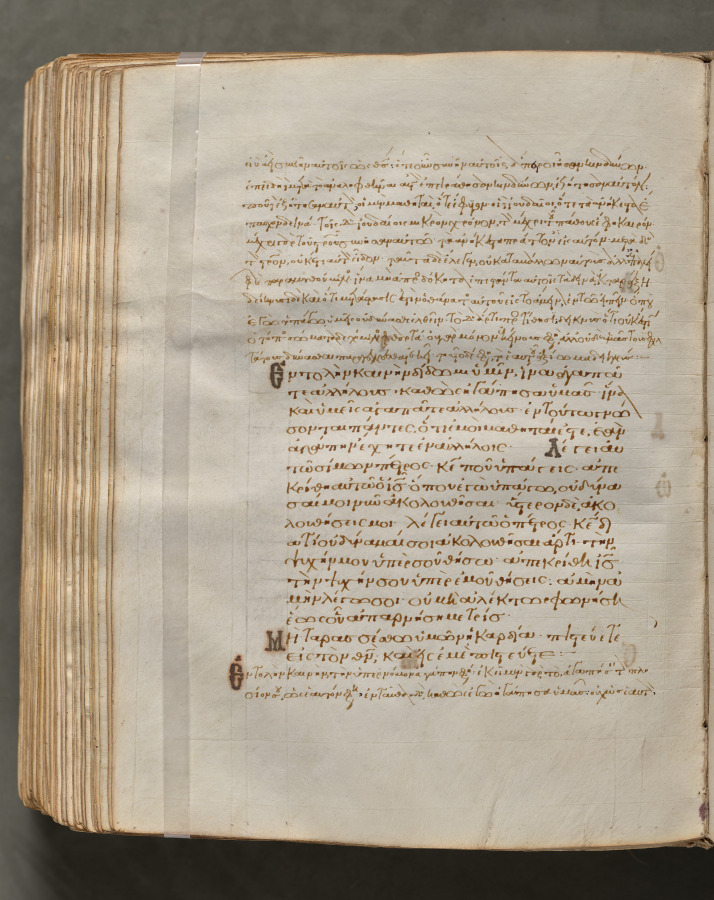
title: Text, folio 391 (verso), from a Gospel Book with Commentaries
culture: Byzantium, Constantinople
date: c. 1000–1100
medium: ink, tempera, and gold on vellum; leather binding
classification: Bound Volume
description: Each of the four gospels in this book opens on a page with brilliantly illuminated borders depicting the author of the text as well as birds—principally peacocks, symbols of the immortality of the soul—and fountains, representing the fountain of life and the salvation of the soul. This volume consists of 428 leaves with texts in Greek. Its level of sophistication suggests that it was probably written and decorated in a monastery in Constantinople.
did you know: Gospel books were carried in procession through Byzantine churches.